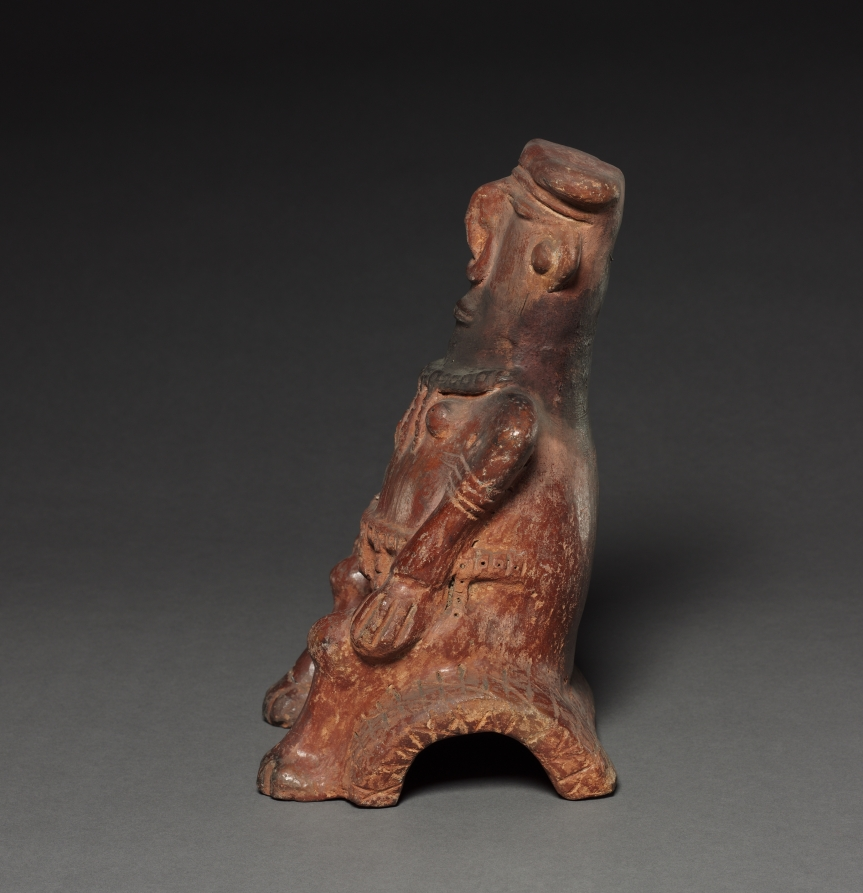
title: Seated Figure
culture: Colombia, 19th-20th century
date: before 1921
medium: red ware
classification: Ceramic